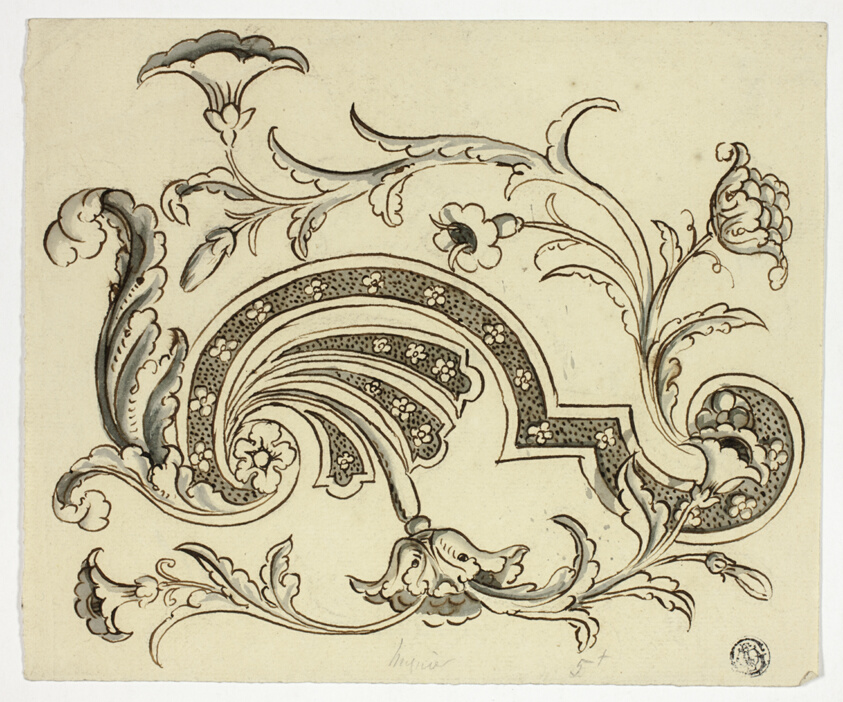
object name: Drawing and Watercolor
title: Design with Poppies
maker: Unknown Artist; European, n.d.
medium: Pen and brown ink, with brush and green and grayish-blue wash, on cream laid paper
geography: Europe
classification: pen and ink drawings; drawings (visual works); prints and drawing